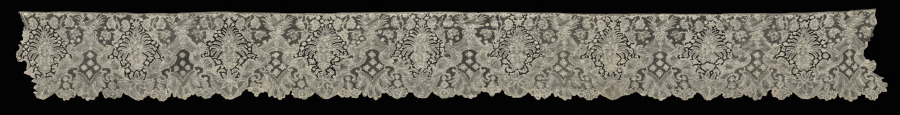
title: Lace Flounce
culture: Belgium, Brabant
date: 1700–1720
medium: Linen: bobbin lace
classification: Lace